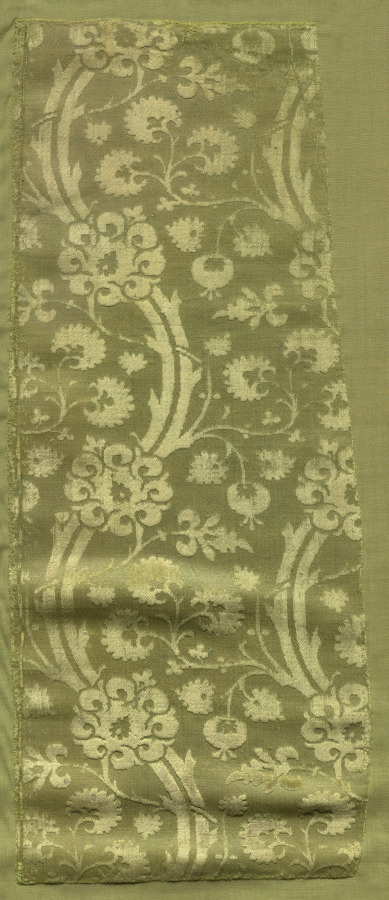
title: Fragment of a Chasuble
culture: Italy, beginning of the 15th century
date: 1400–1420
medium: velvet (cut and voided); silk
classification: Velvet